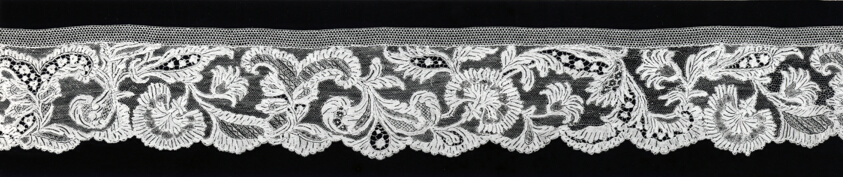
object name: Textile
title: Border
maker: France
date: 1750s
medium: Linen, needle lace of a type known as "Point d'Argentan" with buttonholed mesh ground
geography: France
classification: textile; lace - needle